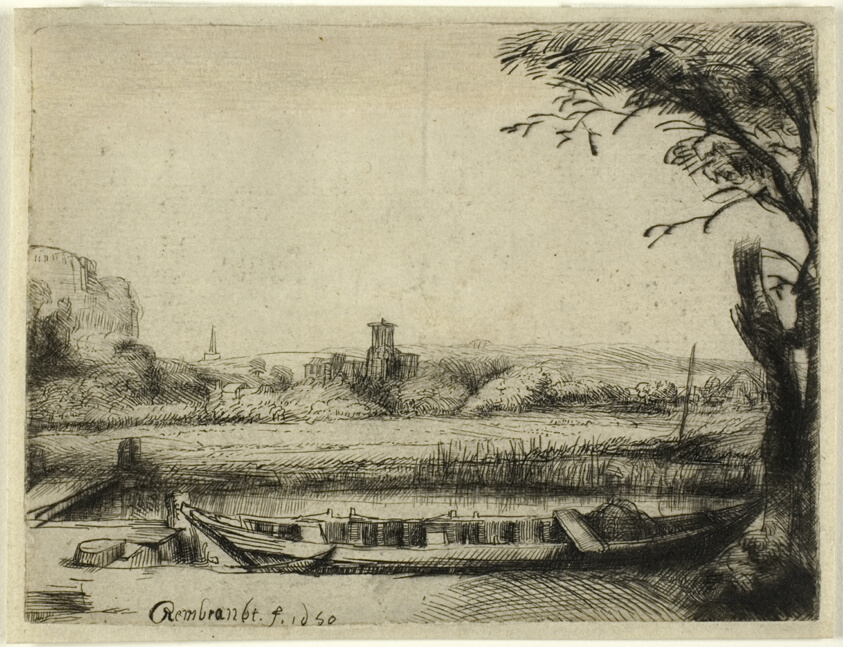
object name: Print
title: Canal with a Large Boat and a Bridge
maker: Rembrandt van Rijn (Dutch, 1606-1669)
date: 1650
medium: Etching on paper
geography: Holland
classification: etching; print; prints and drawing; paper